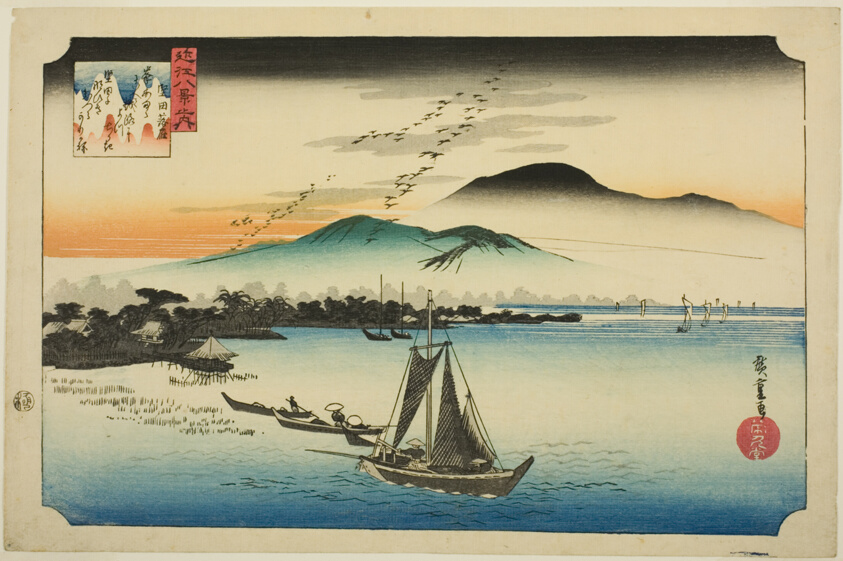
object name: Print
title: Descending Geese at Katada (Katada rakugan), from the series "Eight Views of Omi (Omi hakkei no uchi)"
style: Japanese (culture or style)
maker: Utagawa Hiroshige 歌川 広重; Japanese, 1797-1858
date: c. 1834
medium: Color woodblock print; oban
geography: Japan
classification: woodblock print; print; asian art